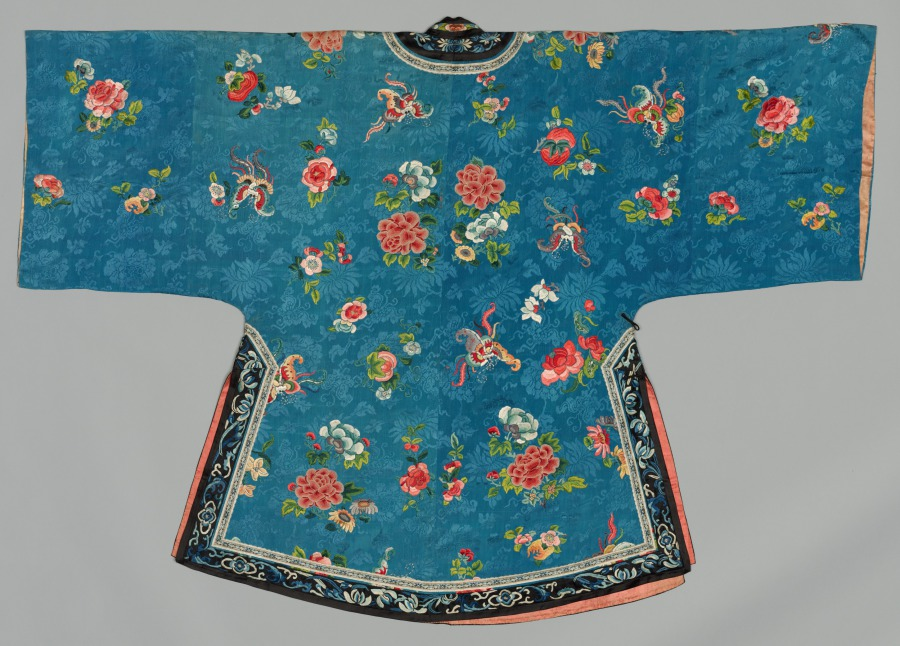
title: Han Woman's Jacket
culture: China, Qing dynasty (1644–1911)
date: 1880s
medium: Silk: embroidery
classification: Garment